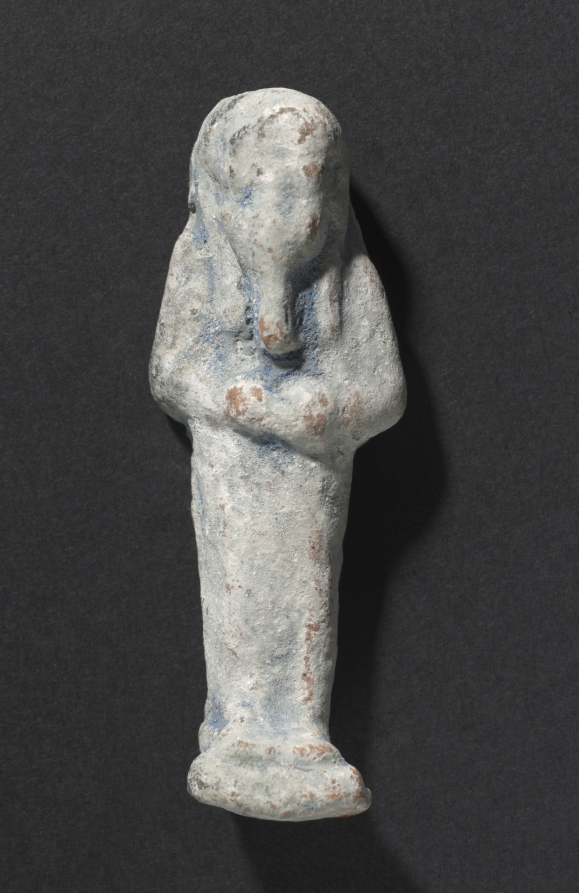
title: Shawabty of Ditamenpaankh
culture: Egypt, Late period (715–332 BCE), Dynasty 25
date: 715–656 BCE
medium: terracotta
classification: Funerary Equipment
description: High demand for shawabtys in the Late Period, a time when as many as 400 or more shawabtys were placed in the tomb with the deceased, gave rise to a specialized container for storing them: the shawabty box. This example is inscribed for the lady of the house, Ditamenpaankh, and was probably one of a pair originally made for her. The single-masted boat on the box's lid is perhaps an allusion to the pilgrimage of the deceased to the holy city of Abydos, the cult city of Osiris, king of the dead. The shawabtys inside are crude, mass-produced examples cast in an open mold. Made of terracotta, their blue paint imitates more costly shawabtys made of faience. As for the shawabty spell, it has been removed from its traditional location on the shawabty's front and relocated onto the sides of box, where it needed only to be written once, thus expediting production.